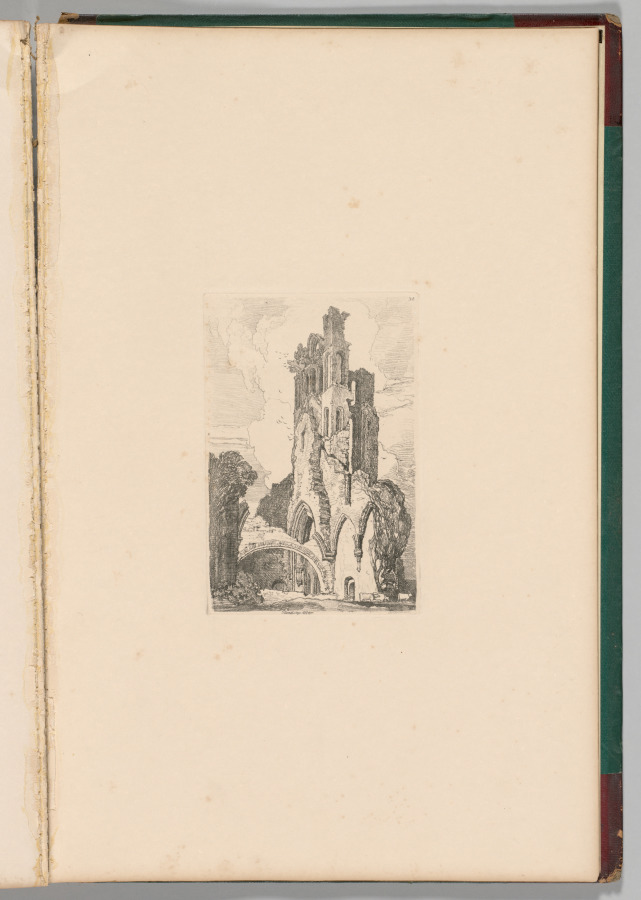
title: Liber Studiorum: Plate 34, Llanathony Abbey, Monmouthshire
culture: England, 19th century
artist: John Sell Cotman (British, 1782–1842)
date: 1838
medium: softground etching, from a bound volume containing 48 plates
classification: Bound Volume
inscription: In plate, within image, upper right: 34; in plate, below image: Planathony Abbey JS Cotman